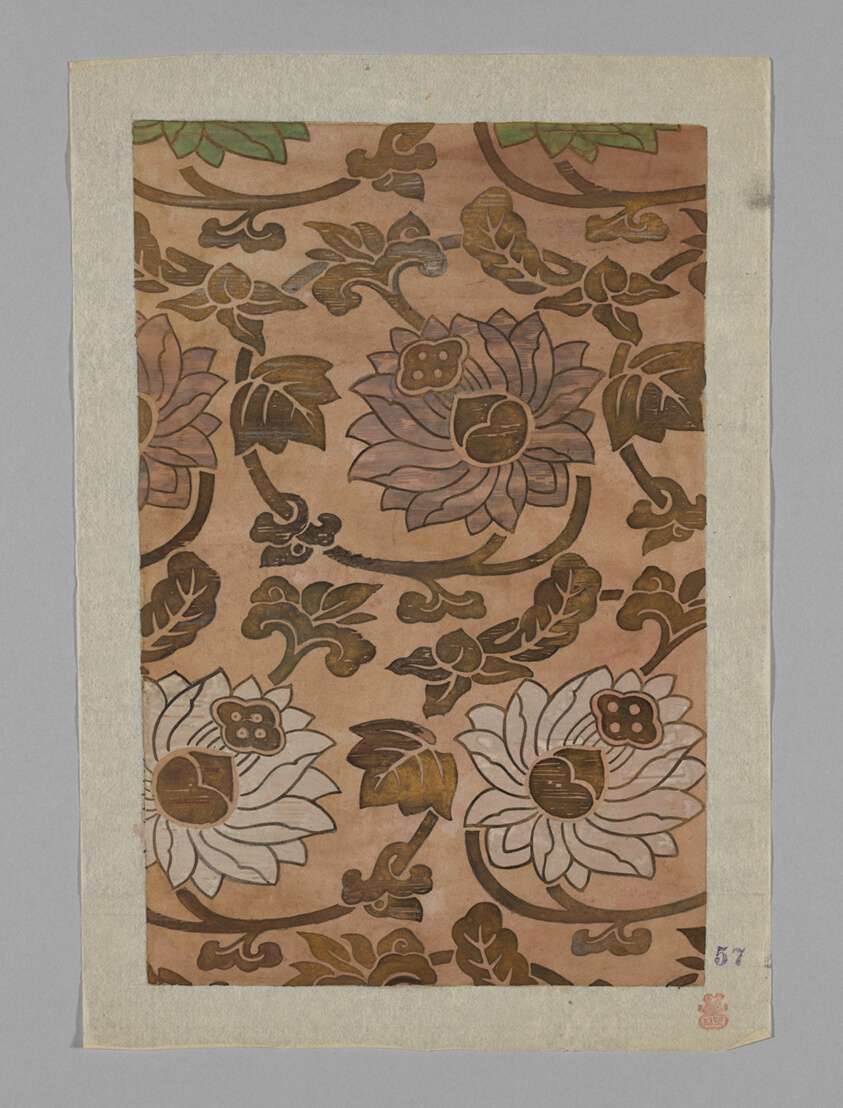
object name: Drawing and Watercolor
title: Design on Paper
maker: Japan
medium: Paper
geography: Japan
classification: textile; accessory - paper design; watercolor; paper